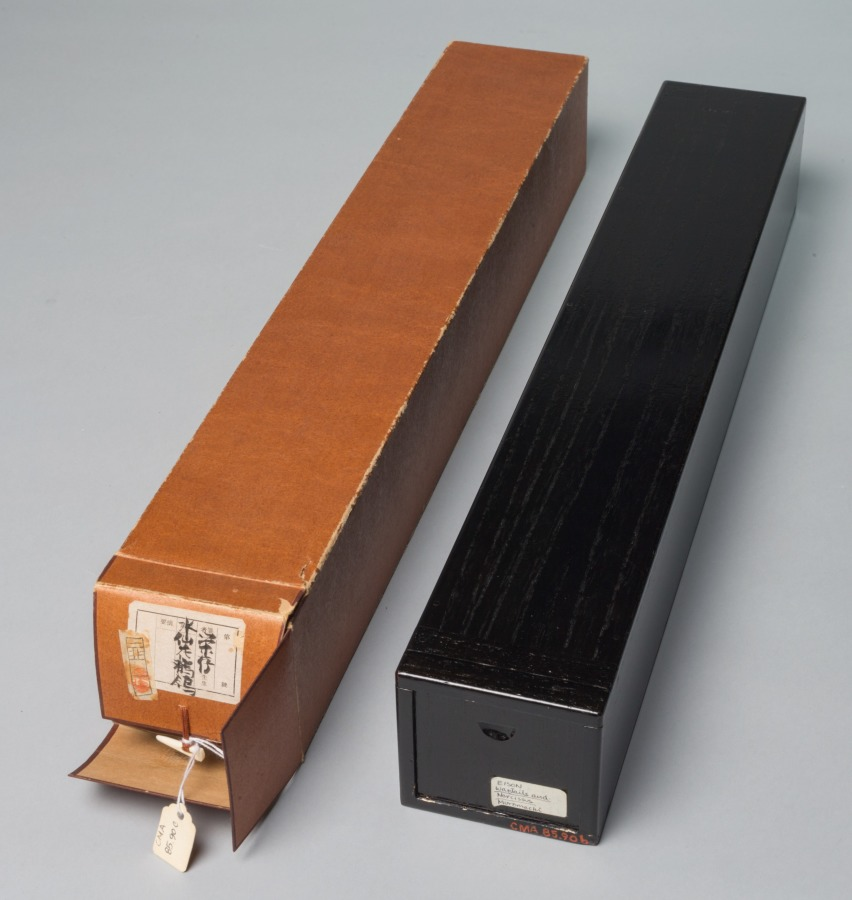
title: Wagtails and Narcissus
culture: Japan, Muromachi period (1392–1573)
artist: Eison (Japanese)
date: mid-1500s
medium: hanging scroll; ink on paper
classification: Painting